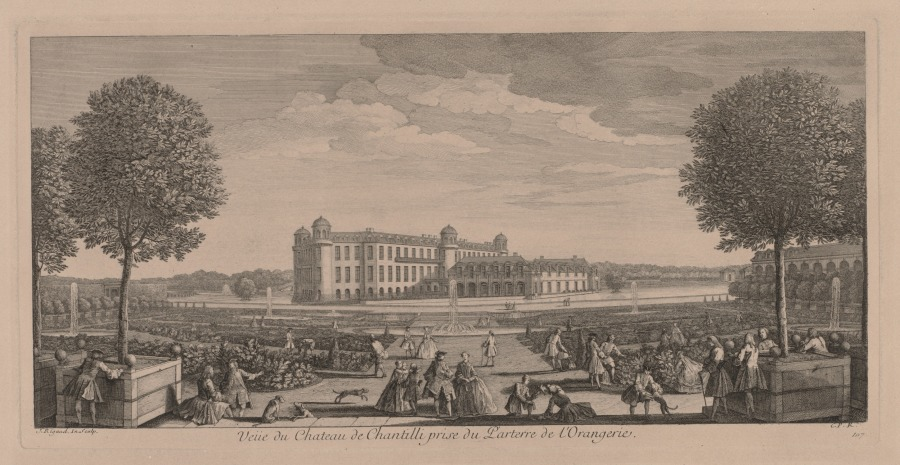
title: Chateau Chantilly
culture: France, 18th century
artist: Jacques Rigaud (French, 1681–1754)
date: c. 1720–50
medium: engraving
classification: Print